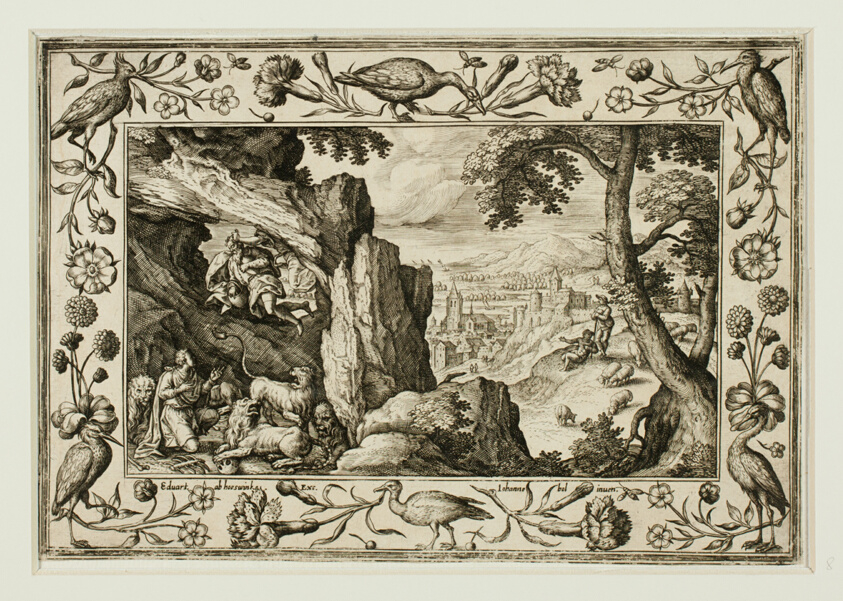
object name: Print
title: Daniel in the Lion's Den, from Landscapes with Old and New Testament Scenes and Hunting Scenes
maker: Adriaen Collaert (Flemish, c. 1560–1618); after Hans Bol (Flemish, 1535–1593); published by Anna van Hoeswinckel (Flemish)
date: 1584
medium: Engraving in black on cream laid paper, laid down on cream laid paper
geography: Flanders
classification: engraving; paper; print; prints and drawing